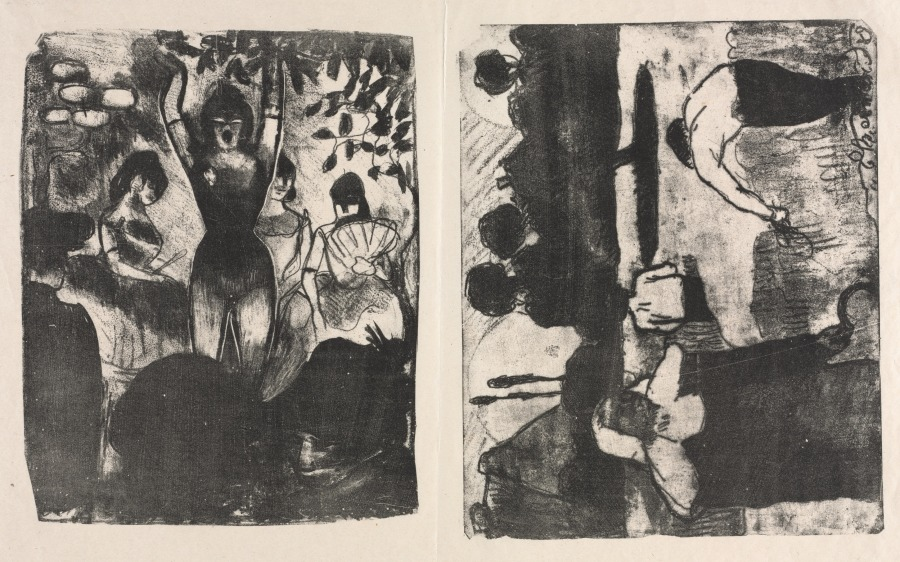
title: Singer at the Café-Concert and The Harvesters (Les Moissonneurs)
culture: France, 19th century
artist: Émile Bernard (French, 1868–1941)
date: 1888, printed 1896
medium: lithograph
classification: Print